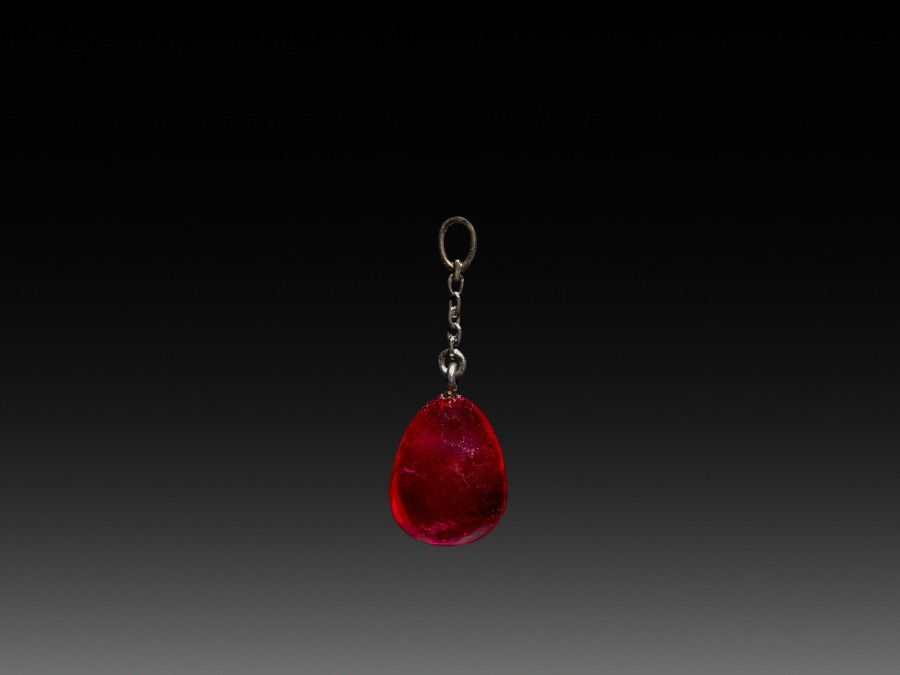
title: Ruby or Pink Sapphire Surprise from the Lapis Lazuli Easter Egg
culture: Russia, St. Petersburg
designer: attributed to Peter Carl Fabergé (Russian, 1846–1920)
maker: attributed to House of Fabergé (Russian, 1842–1918)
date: c. 1885–90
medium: gold, enamel, lapis lazuli, pearls, diamonds, rubies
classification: Miscellaneous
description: This Easter egg, like the subsequent ones produced by Fabergé for the imperial family, contains a surprise when opened. In this case, the egg opens to display a yellow enameled cover, resembling an egg yolk, which then opens to reveal a tiny replica of the Russian imperial crown, containing either a ruby or a pink sapphire suspended on a chain.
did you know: This tiny ruby or pink sapphire dangles from a diamond encrusted crown surprise, which is a replica of the Russian imperial crown made for Empress Catherine the Great in the 1700s.